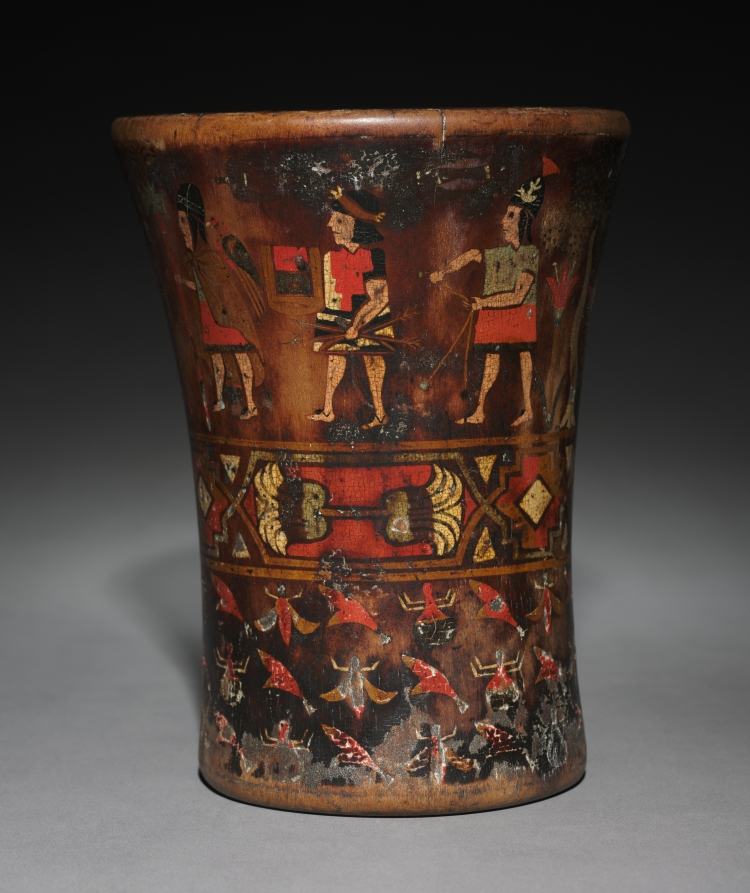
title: Kero (Waisted Cup)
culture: Peru, Colonial Inka style, 16th century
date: after 1550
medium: wood, inlaid pigments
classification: Wood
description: Keros, used to drink the maize beer chicha, were essential items of Inka statecraft. Made and used in pairs, they reflect the important Andean concept of reciprocity. Native use of keros continued in the colonial period, the date of these two examples, which come from separate pairs. The example with geometric motifs is closest to pre-conquest models. On the second, two armies converge: the Inka, dressed in tunics with waistbands, and their opponents, perhaps jungle people whose body parts are heaped in a centerpiece.